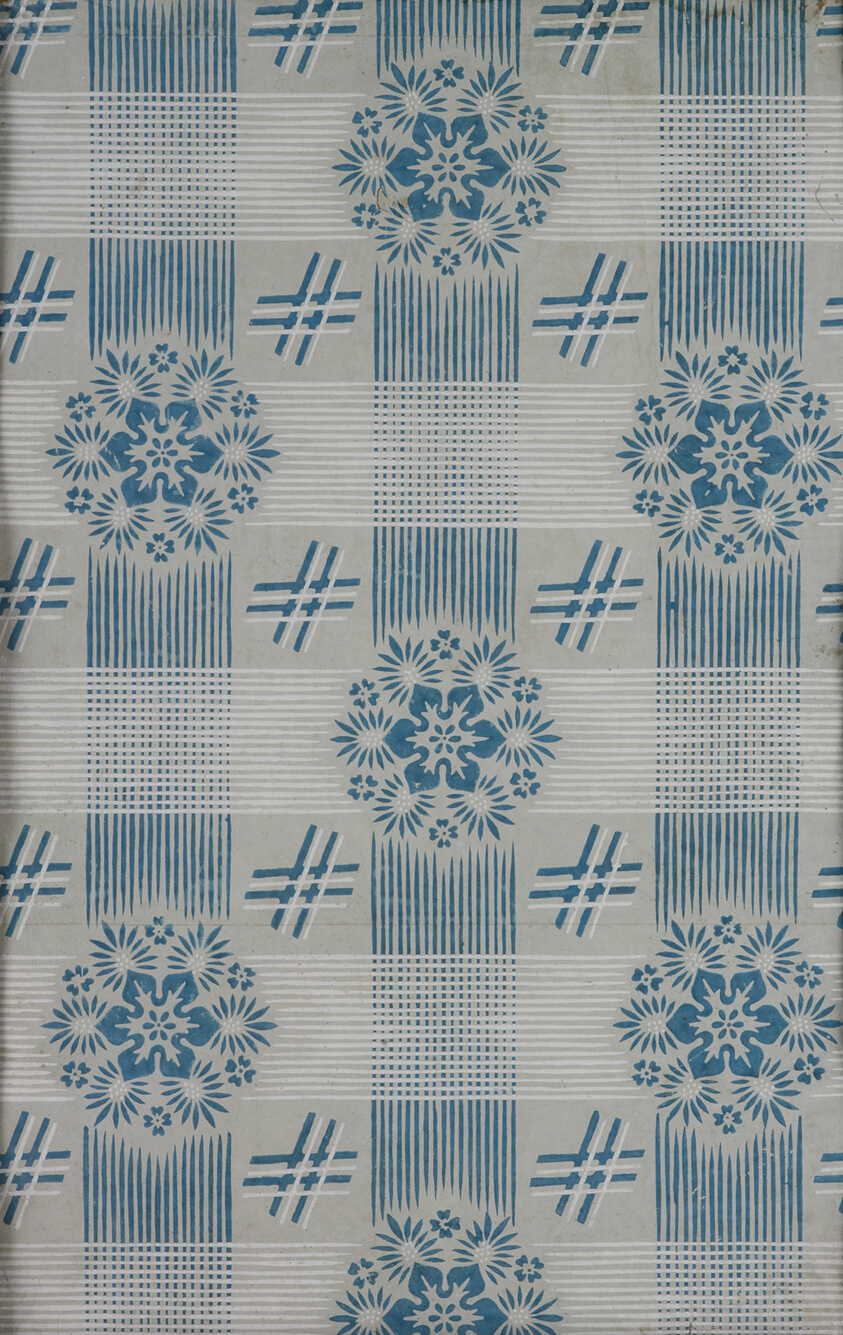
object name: Coverings and Hangings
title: Wallpaper Fragment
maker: France; Dauptain et Soeur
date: 1820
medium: Block-printed, handmade paper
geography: Paris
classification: wallpaper; paper; european decorative arts